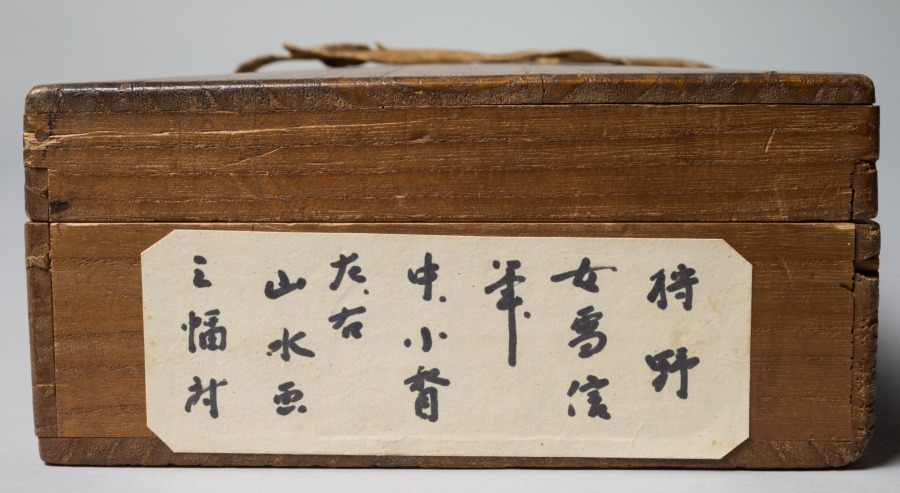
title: Minamoto no Nakakuni Visits Lady Kogō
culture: Japan, Edo period (1615–1868)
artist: Kiyohara Yukinobu (Japanese, 1643–1682)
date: late 1600s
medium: Triptych of hanging scrolls; ink and color on silk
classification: Painting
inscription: 款記「清原氏女雪信筆」/「清原女」朱文八角印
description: An aristocrat rides up a path to a residence where a woman plays a koto, a stringed instrument. The central composition is flanked on the right by a day-lit spring scene, and on the left by a nocturnal autumnal scene. The triptych presents an episode from The Tale of the Heike in which Minamoto no Nakakuni is sent by the emperor to look for Lady Kogō.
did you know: The Tale of the Heike chronicles the conflict between the Taira (Heike) and Minamoto (Genji) families in the late 12th century.